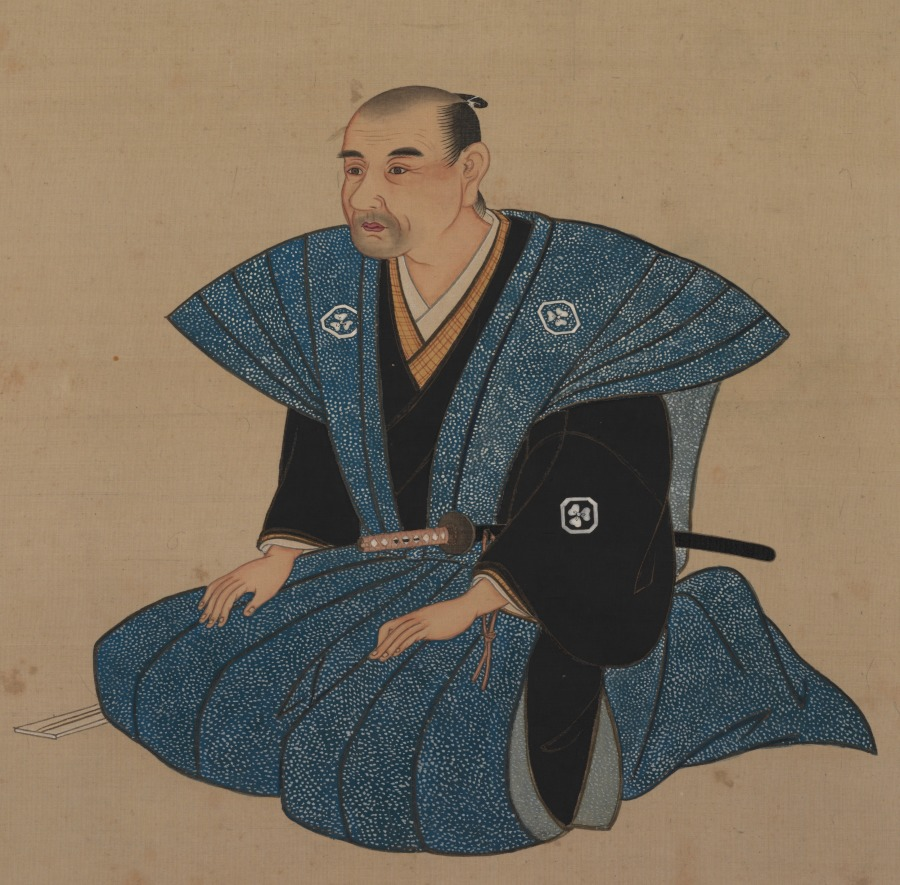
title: Portrait of Samurai-Official: Hirai Rinsei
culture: Japan, Edo period (1615–1868)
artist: attributed to Tsukioka Settei (Japanese, 1710–1786)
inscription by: Jogen (Japanese)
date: 1776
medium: hanging scroll; ink and color on silk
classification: Painting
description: In this pair of figure paintings, the artist provided generational portraits of two clan leaders from the Hirai family, accompanied by lengthy inscriptions in a distinctive calligraphic style from separate scholar-officials.